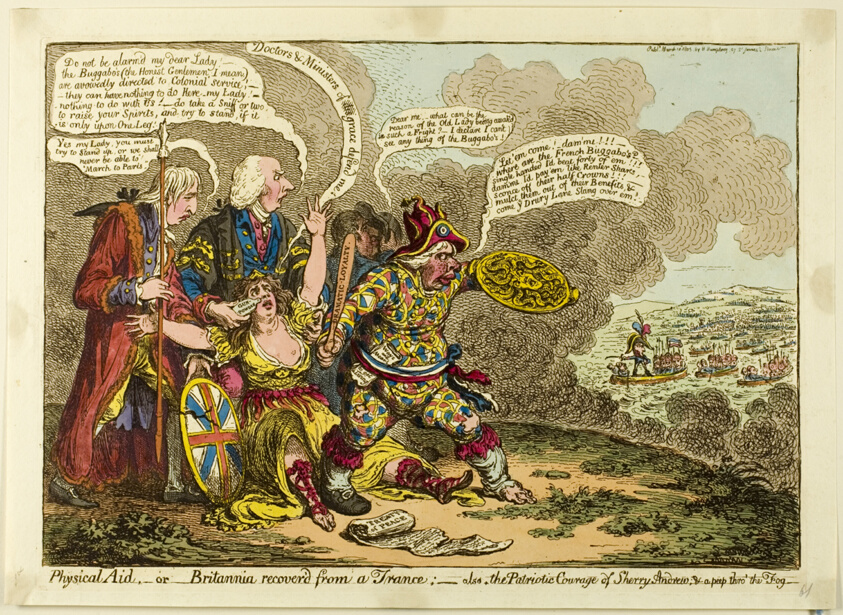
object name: Print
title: Physical Aid, or Britannia Recover'd from a Trance!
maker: James Gillray (English, 1756-1815); published by Hannah Humphrey (English, c. 1745-1818)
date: published March 14, 1803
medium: Hand-colored etching on paper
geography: England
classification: etching; print; prints and drawing